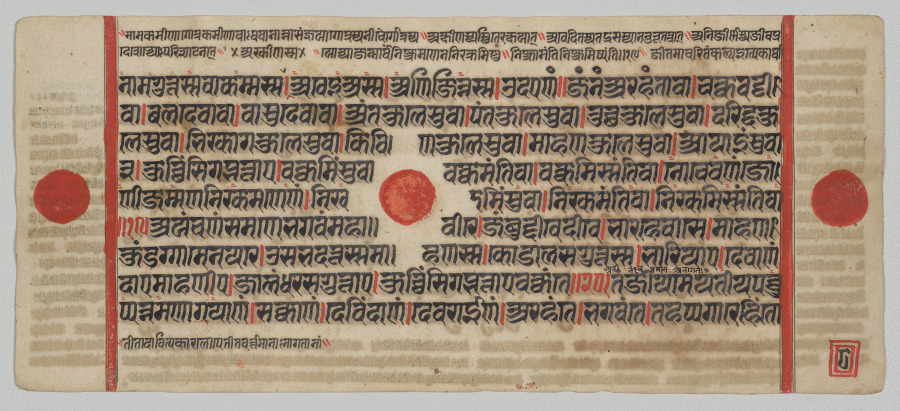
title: Text, Folio 8 (verso), from a Kalpa-sutra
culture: Western India, Gujarat, last quarter of the 15th century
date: c. 1475–1500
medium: Gum tempera, ink, and gold on paper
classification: Painting